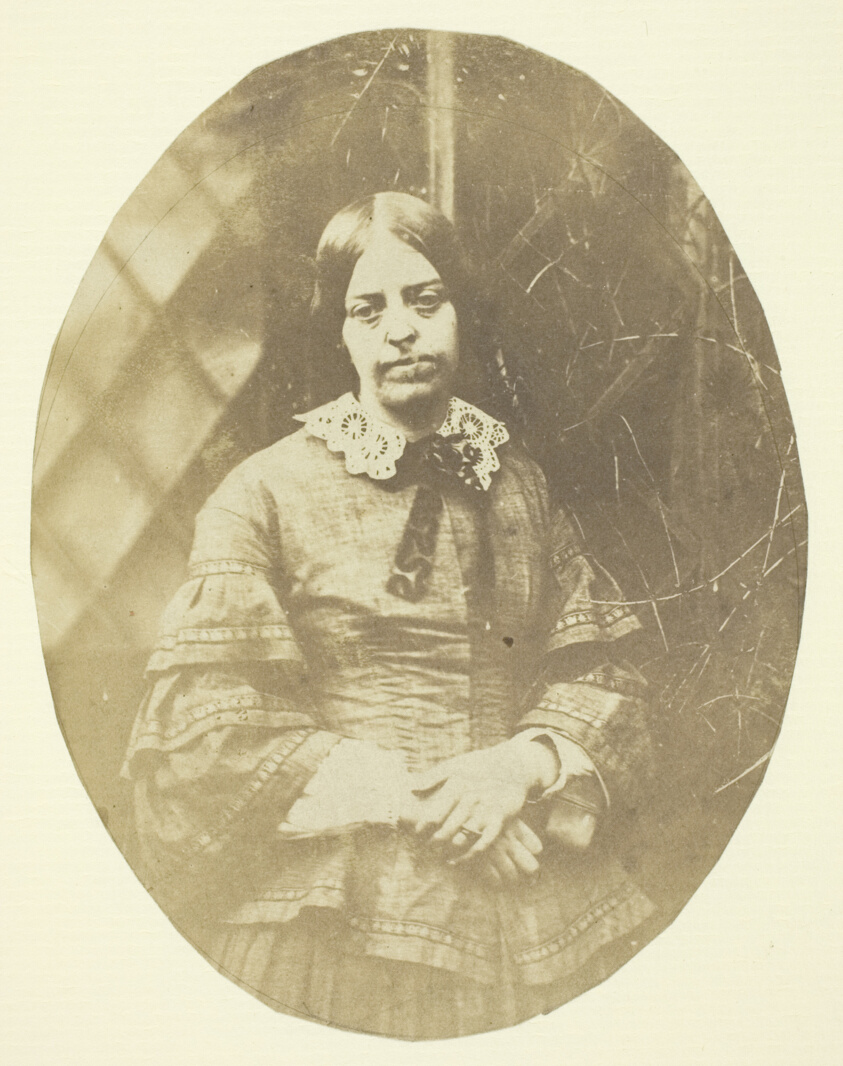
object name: Photograph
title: Mrs. Craik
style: 19th century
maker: Artist unknown, possibly Benjamin Mulock (English, 1829–1863); English, 19th century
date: 1850/59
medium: Calotype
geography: England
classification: salted paper print; photographic process; photography; photograph